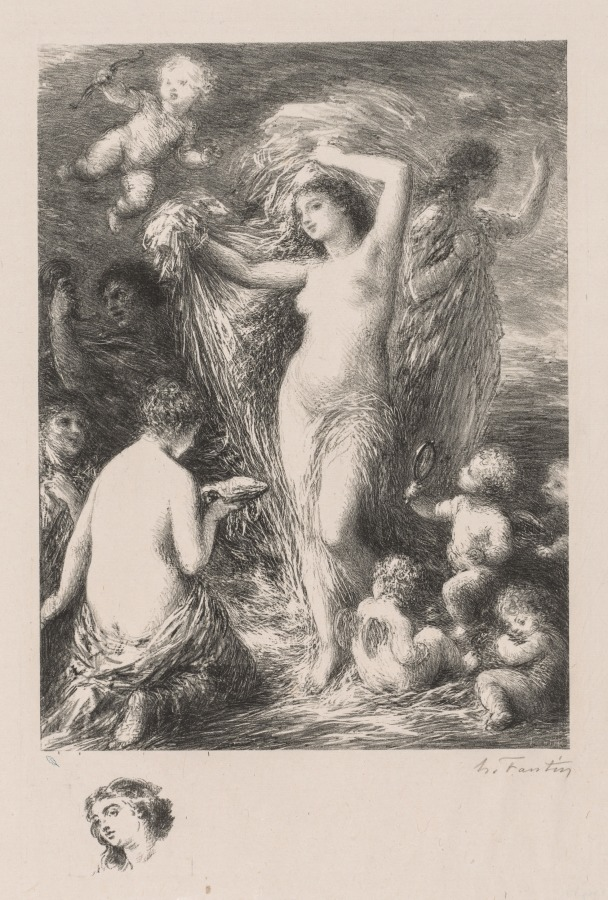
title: Venus Anadyomene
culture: France, 19th century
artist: Henri Fantin-Latour (French, 1836–1904)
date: 1898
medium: lithograph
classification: Print